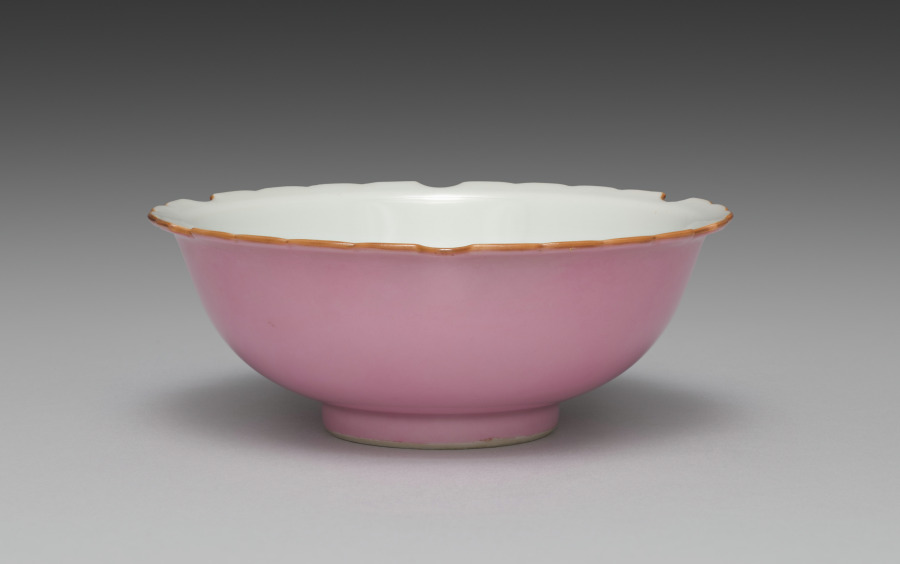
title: Dish from Snow-Flake Side Dishes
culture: Japan, Meiji period (1868–1912)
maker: Seifū Yohei III (Japanese, 1851–1914)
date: 1893–1914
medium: One from a set of six porcelain dishes; porcelain with lobed rims and pink glaze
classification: Ceramic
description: According to the box lid, this set of 6 side dishes, or mukōzuke, are “snow-flower style” (sekkashiki), having mouths shaped like snowflakes. Their mouths, which have 6 lobes and scalloped edges, are traced with brown iron oxide at the rim. The outside of each bowl is glazed with a very bright pink over the basin and foot, and the inside is left white. From directly above, one sees a snowflake-like shape, and from the side, they seem to float above a rosy ground.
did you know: The box for this set of dishes has an inscription on the side noting that they were for a person with the family name Nakamoto.